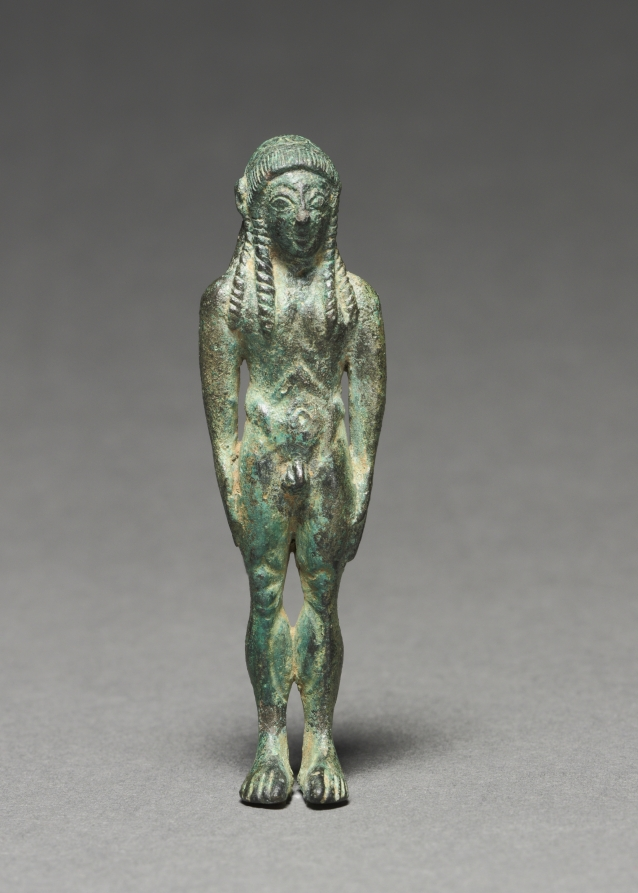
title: Statuette of a Kouros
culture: Etruscan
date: 600–480 BCE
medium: bronze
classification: Sculpture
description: Though almost certainly Etruscan in origin, this small-scale bronze takes the form of a Greek kouros, a nude male youth with arms at sides looking straight ahead. The left foot appears ever so slightly advanced, but not enough to create any real sense of movement. Two long locks of hair fall over each shoulder, recalling Ionian (East Greek) examples, but the scale-like pattern on the back of the head is unusual. Despite the lack of nudity in most other Archaic Etruscan artworks, the kouros became quite popular as a small bronze votive type in Etruria.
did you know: Unlike Greek kouroi, which range in medium and scale, Etruscan kouroi are primarily small bronzes.